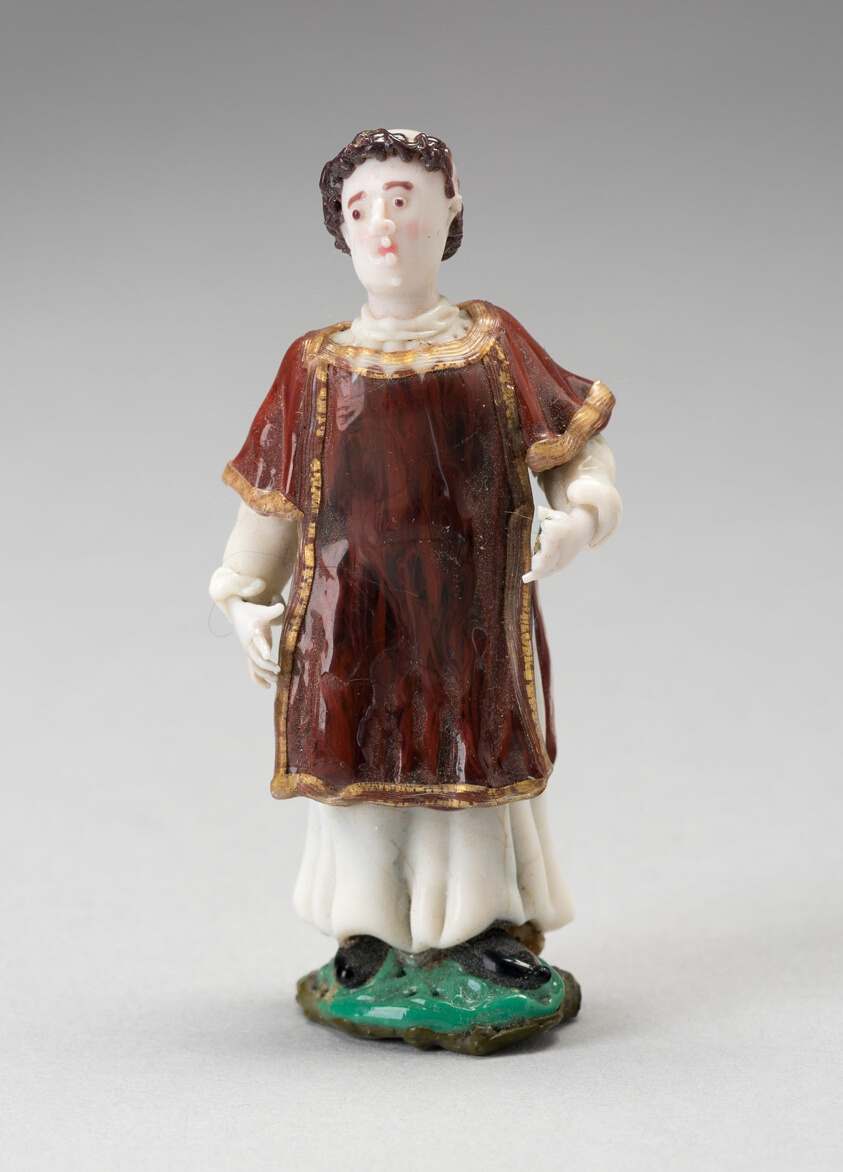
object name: Glass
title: Priest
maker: Nevers, France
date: Late 18th to early 19th century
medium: Glass; lampwork (verre de Nevers), metal armature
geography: France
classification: glass; miniature; decorative object/ornament; european decorative arts